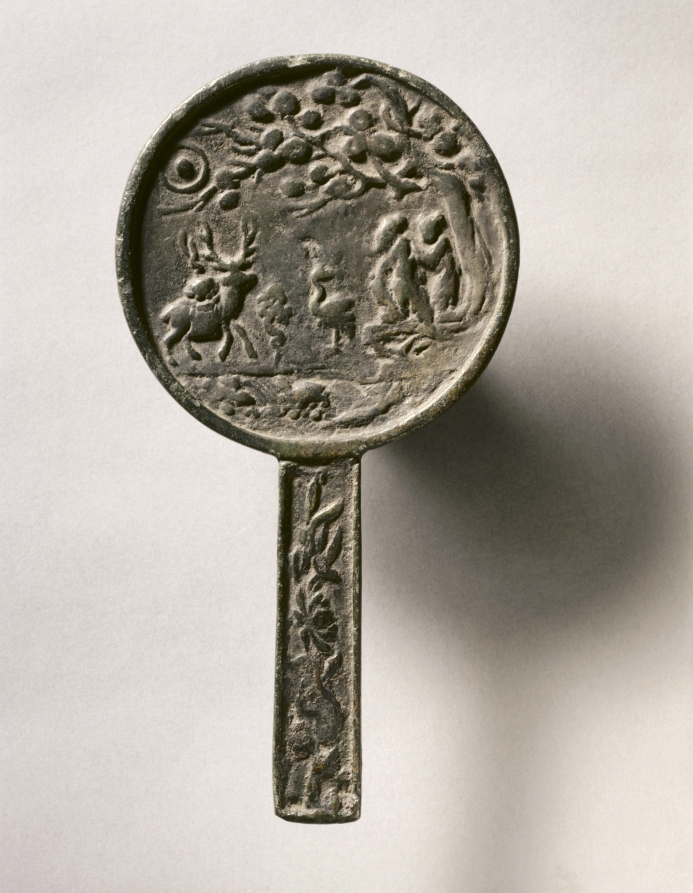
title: Narrative Mirror with Handle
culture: China, Jin dynasty (1115-1234) - Yuan dynasty (1271-1368)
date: early 12th Century - mid 14th Century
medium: bronze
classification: Metalwork